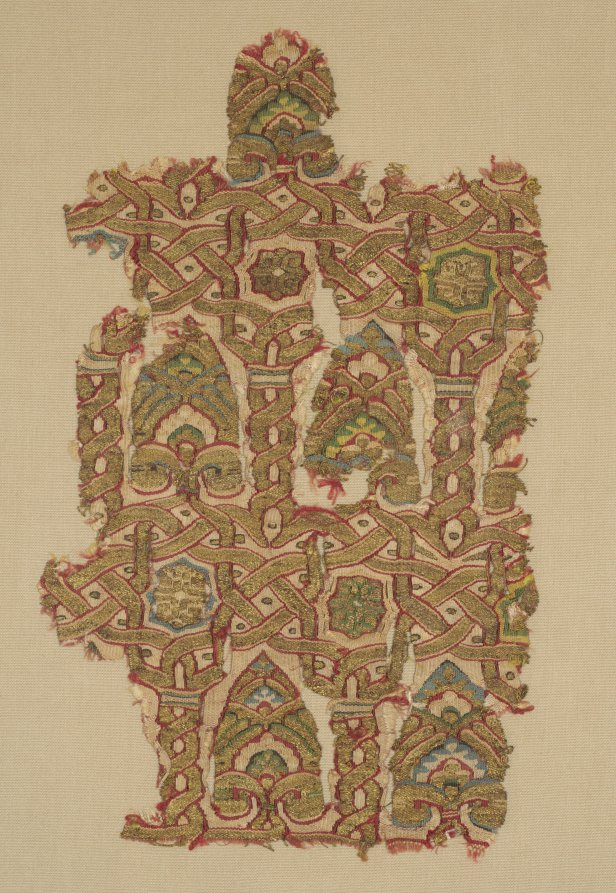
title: Fragment with arcade and palmettes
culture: Spain, probably Granada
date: 1200s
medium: Silk and gold thread: tapestry weave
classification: Textile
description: Although geometric patterns were fashionable in all media throughout the Islamic world, examples in textiles are the most abundant from Islamic Spain. In this fragment, gold-thread strapwork interlaces to form stars above columns that frame colorful palmette leaves in a fine tapestry weave.